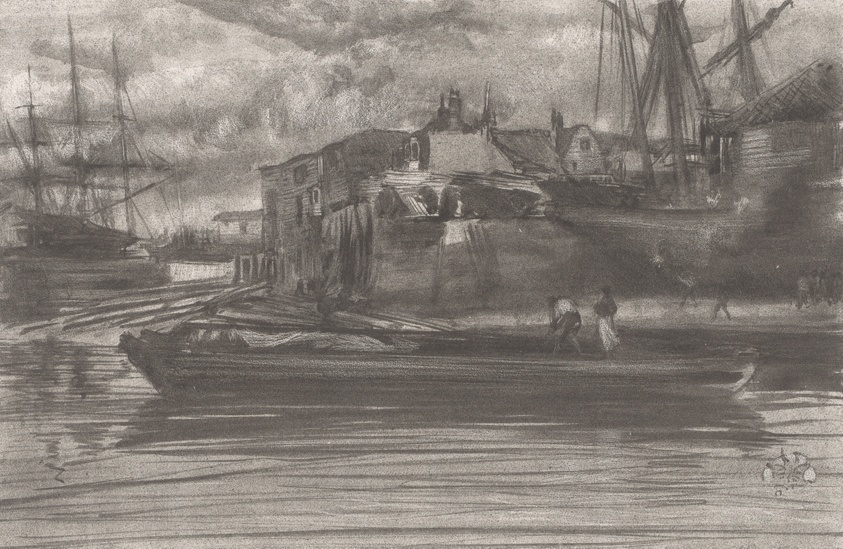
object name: Print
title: Limehouse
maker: James McNeill Whistler (American, 1834-1903)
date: 1878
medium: Lithotint in black ink with scraping and incising, on a prepared half-tint ground, on off-white plate paper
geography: United States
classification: lithotint; lithograph; print; prints and drawing; paper